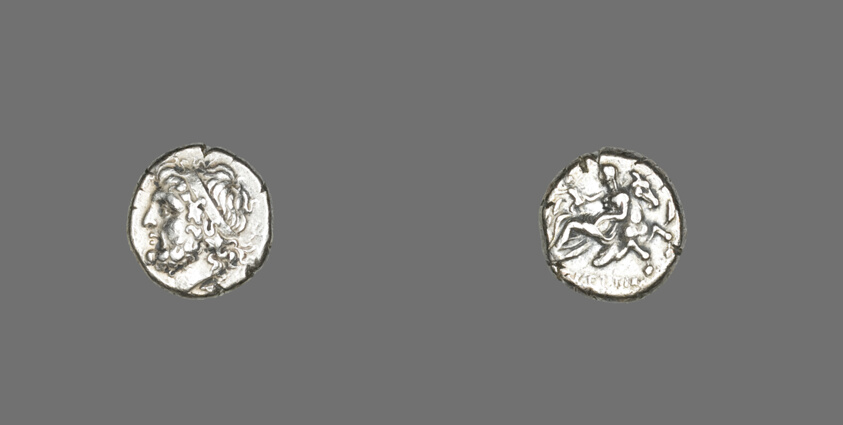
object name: Coin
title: Hemidrachm (Coin) Depicting Poseidon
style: greek, ancient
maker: Greek, minted in Kroton/Bruttium, Italy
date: 3rd century BCE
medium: Silver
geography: Italy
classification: coin; ancient art; struck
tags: mythological figures, gods (deities)